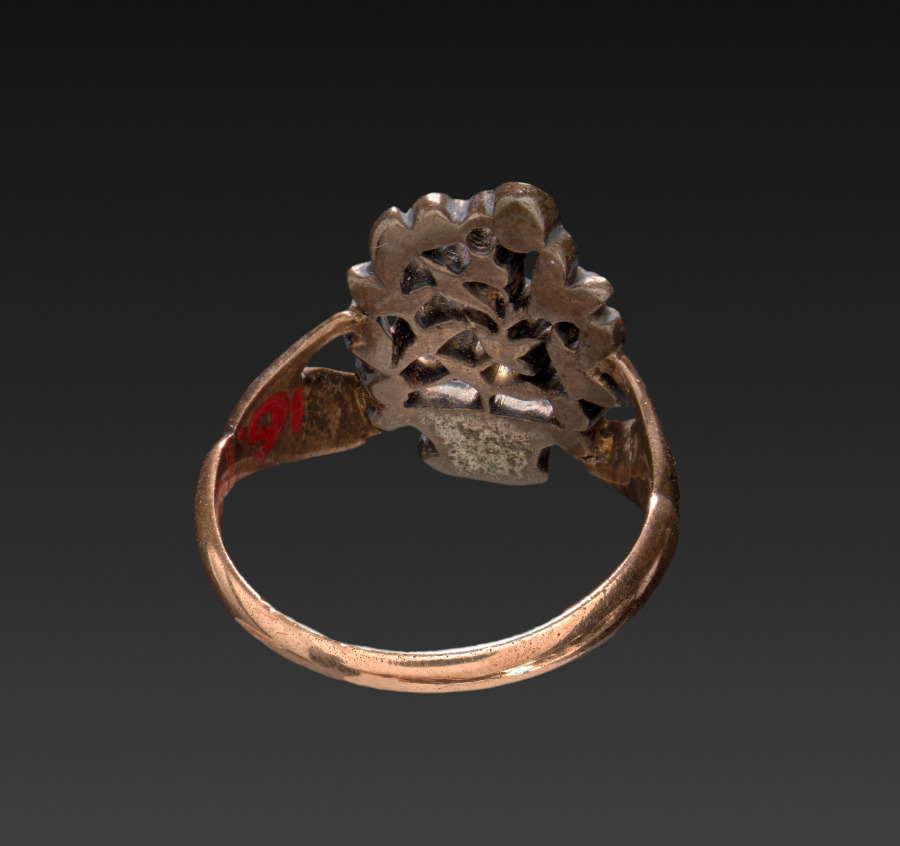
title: Ring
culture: France (?)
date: 1700s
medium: gold band, silver ornamental basket with garnet and diamond chips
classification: Jewelry